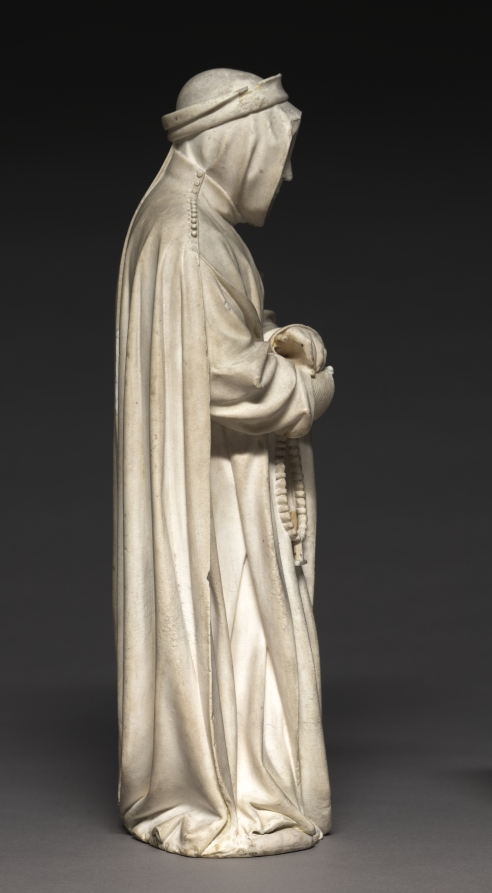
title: Mourner from the Tomb of Philip the Bold, Duke of Burgundy (1364–1404)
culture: Netherlands, active Dijon, 15th century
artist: Claus de Werve (Netherlandish, 1380–1439)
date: 1404–1410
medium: vizille alabaster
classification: Sculpture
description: This figure comes from the tomb of Duke Philip the Bold from the church of Champmol near Dijon (Burgundy, France). Philip, who founded the monastery and designated it as his burial place, hired the best artists, many of whom came from the Netherlands. While the commission was given in 1381, the work was not completed until 1410, six years after the duke’s death. This mourner is unusual for the time because it is not carved as a static low relief on the pedestal of the tomb but interacts with the viewers and their fellow procession members. The lifelike quality of the figure is due in large part to the alabaster. Its softness allowed artists to carve details into the material, and the transparent, milky white stone could also be polished to a high gloss.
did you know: During his life, Duke Philip founded the monastery of Chartreuse de Champmol to serve as a final resting place for himself and his family.